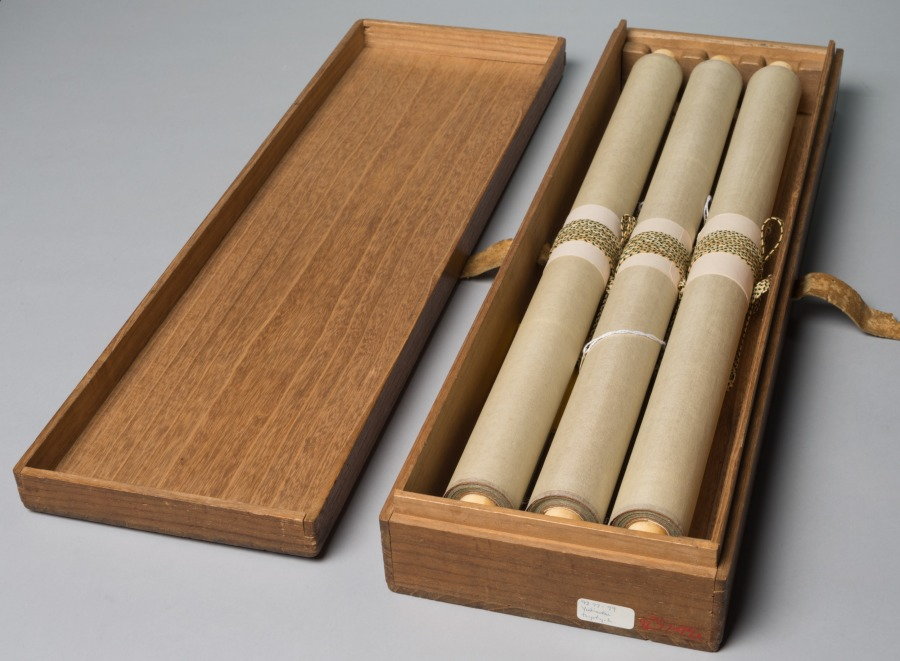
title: Minamoto no Nakakuni Visits Lady Kogō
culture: Japan, Edo period (1615–1868)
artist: Kiyohara Yukinobu (Japanese, 1643–1682)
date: late 1600s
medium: Triptych of hanging scrolls; ink and color on silk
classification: Painting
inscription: 款記「清原氏女雪信筆」/「清原女」朱文八角印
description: An aristocrat rides up a path to a residence where a woman plays a koto, a stringed instrument. The central composition is flanked on the right by a day-lit spring scene, and on the left by a nocturnal autumnal scene. The triptych presents an episode from The Tale of the Heike in which Minamoto no Nakakuni is sent by the emperor to look for Lady Kogō.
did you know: The Tale of the Heike chronicles the conflict between the Taira (Heike) and Minamoto (Genji) families in the late 12th century.